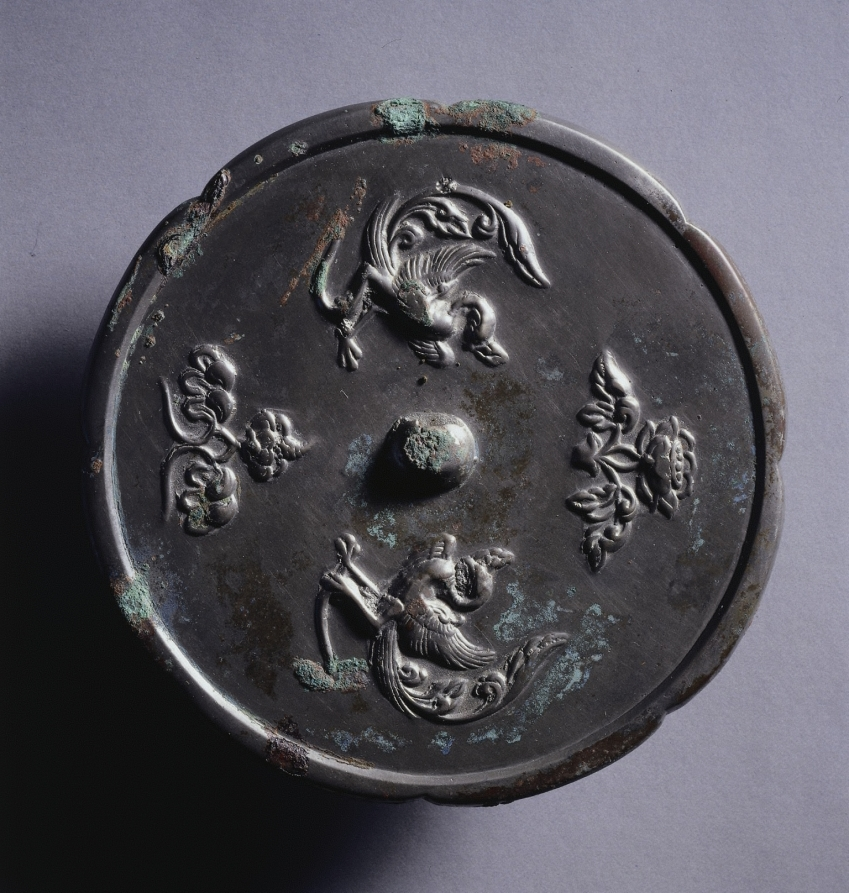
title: Lobed Mirror with Paired Phoenixes and Floral Displays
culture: China, Tang dynasty (618-907)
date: 700s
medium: bronze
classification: Metalwork